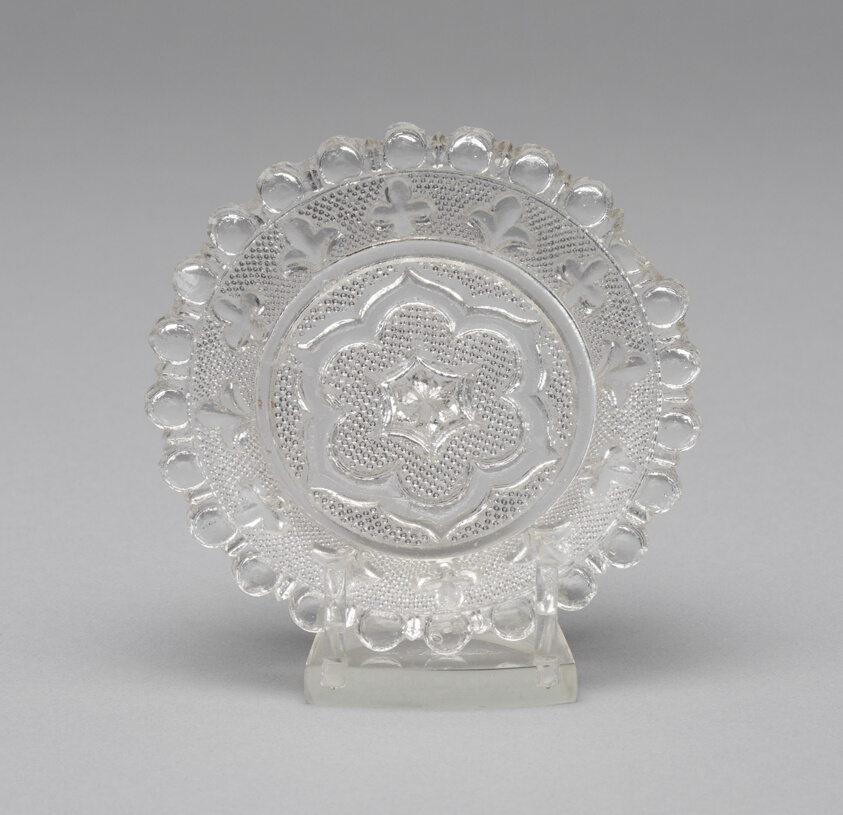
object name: Glass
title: Cup plate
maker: Artist unknown (American, 19th century); Midwest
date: 1830–35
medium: Pressed glass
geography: Midwest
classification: plate (general, dish); glass; american decorative arts; american arts; decorative arts